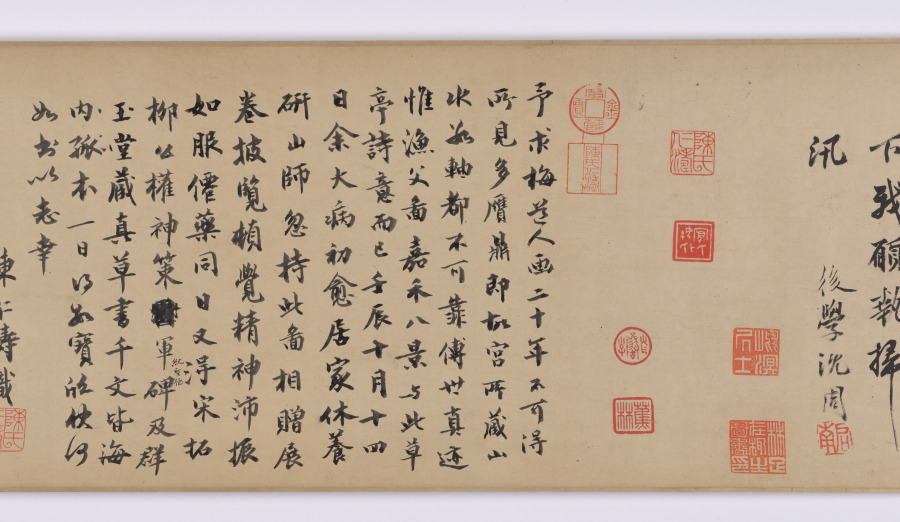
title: Poetic Feeling in a Thatched Pavilion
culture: China, Yuan dynasty (1271-1368)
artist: Wu Zhen (Chinese, 1280–1354)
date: 1347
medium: handscroll; ink on paper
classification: Painting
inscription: 依村構草亭，端方意匠宏。 林深禽鳥樂，塵遠竹松輕。 泉石俱延賞，琴書悅性情。 何當謝凡近，任適慰平生。 至正七年丁亥冬十月，為元澤戲作草亭詩意。梅沙彌書 [印]楳華盦; 嘉興吳鎮仲圭書畫記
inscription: 我愛梅花翁，巨老傳心印。 脩此水墨缘，種種得蒼潤。 樹石墮筆鋒，造化不能吝。 而今橡林下，我願執掃汛。 後學沈周 [印]启南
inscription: Colophon by Chen Rentao (1952): 予求梅道人畫二十年不可得。所見多膺鼎，即故宮所藏山水數軸都不可靠。傳世真迹，惟《漁父圖》、《嘉禾八景》與此《草亭詩意》而已。壬辰十月十四日余大病初愈，居家休養，研山師忽持此圖相贈。展卷披覽，頓覺精神沛振，如服僊藥。同日又得宋拓柳公權《神策軍紀聖德碑》，及群玉堂藏《真草書千(字)文》，皆海內孤本。一日得數寶，欣喜何如，書以志幸。 陳仁濤識 [印]陳氏仁濤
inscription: Colophon by Chen Rentao: 此圖作於至正七年丁亥，時年六十八，盖其晚年神品也。 濤又識 [印]陳仁濤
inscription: Title on frontispiece by Li Dongyang 李東陽 (1447-1516).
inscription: 33 additional seals: 1 seal of Li Chao-heng 李肇亨 (1592-1664)：檇李李肇亨書畫記; 9 seals of Liang Qingbiao 梁清標 (1620-1691): 蒼巖子、蕉林、蕉林梁氏書畫之印、蕉林秘玩、蕉林書屋、蕉林玉立氏圖書、棠邨 (appears twice)、棠邨審定; 1 seal of Wang Yirong (1845-1900): 懿榮; 3 seal of Li Yanshan (1898-1961): 雙銕笛樓 (appears twice)、硯山心賞; 12 seals of Chen Rentao 陳仁濤（1906-1968）：陳氏仁濤、陳仁濤珍藏印、金匱寶藏·陳氏仁濤 (appears three times)、金匱秘笈、金匱室、金匱室精鑒璽 (appears twice)、金匱室主、金匱神品、仁濤奇緣; 1 seal: 崐溟居士; 1 seal: 林止在㭯生圖書印; 3 seals unidentified.